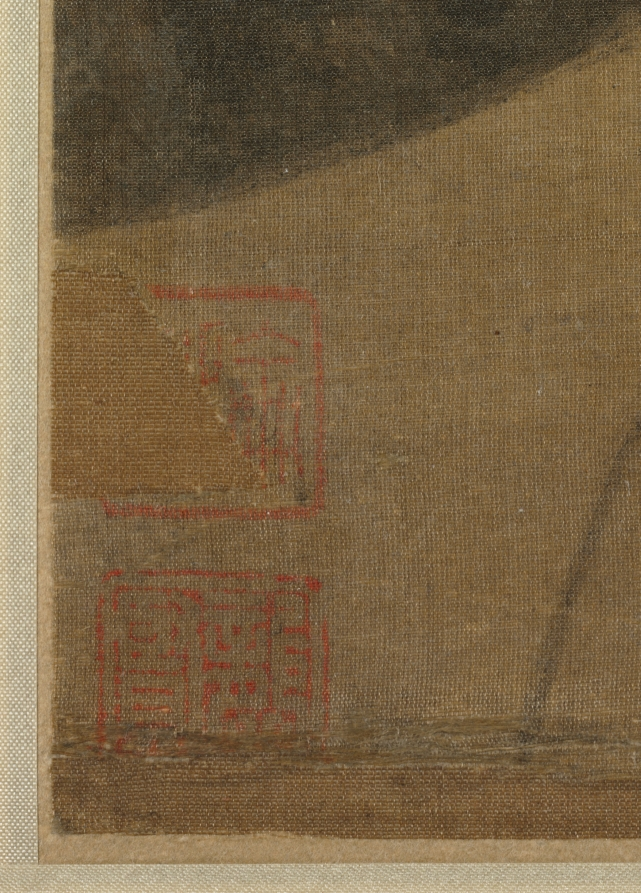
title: Landscape in the Style of Dong Yuan and Juran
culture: China, Qing dynasty (1644-1911)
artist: Gong Xian (Chinese, 1599–1689)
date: c. 1650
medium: hanging scroll, ink with white pigment on silk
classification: Painting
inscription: 畫家董巨，實開南宗。既無剛根之氣，復無刻畫之跡。後之作者或以才見，或以法稱。唯董巨則幾乎道矣。然逞才則離法，泥法則叛道。至道無可道。說者謂即歛才就法之謂道。問之董巨，而董巨不知，忽乎微矣。此幅余二十年前舊作。藏之新安吳氏。吳君晉明寶之若家珍。後携之金陵。命余題識。余因與晉明論畫及此，并紀之。非敢曰此效法董巨而有得焉者也。 庚戌冬杪半畝居人龔賢。 [印]龔半千; 野遺賢; [左下]龔賢; [上]可能另有龔賢一印。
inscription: 2 additional seals of Cheng Qi 程琦 (1911–1988)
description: Towering peaks and unfolding ranges are piled up and overlaid with layer after layer of brushwork to give an overall dense, dark, and even melancholic effect. Gong Xian created a personal style of landscape, which departed greatly from his models Dong Yuan and Juran. The tension between tradition and individuality had been a topic of interest for the Chinese artist. As Gong Xian writes in his inscription: "Painters of later periods may be known for their natural talents or praised for their observance of established traditions. . . . However, those who indulge in showing off their talent will deviate from the tradition, while those who adhere to tradition will alienate themselves from the Dao. The supreme Dao is inexplicable in words. . . ."